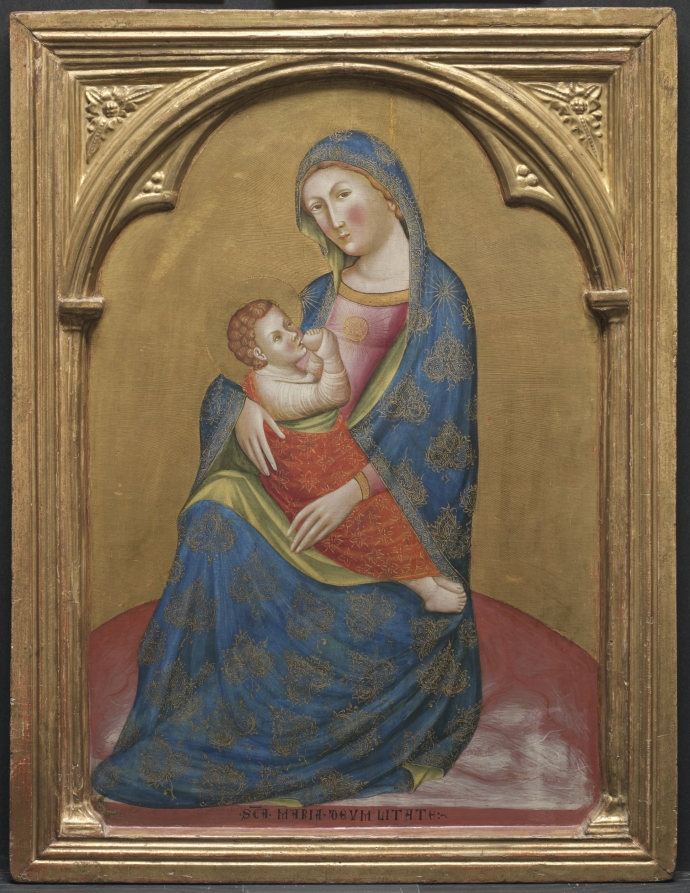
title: Madonna of Humility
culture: Italy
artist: Caterino Veneziano (Italian, active 1362–82)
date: late 1370s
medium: tempera and gold on wood panel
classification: Painting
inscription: SCA. MARIA. DE VM LITATE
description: The Madonna is shown seated on the ground as she nurses the infant Christ in a style of depiction called the "Madonna (or Virgin) of Humility." This type of image shows Mary’s humility, or humilitas in Latin, sitting on the earth just with a cushion in contrast to her usual depiction with a throne. The virtue of humility was propagated especially by St. Francis of Assisi and found its way into painting since the 1350s in the wake of the Black Death.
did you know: This panel used to be part of a larger altarpiece; it was cut down and reframed some time in the 1800s.